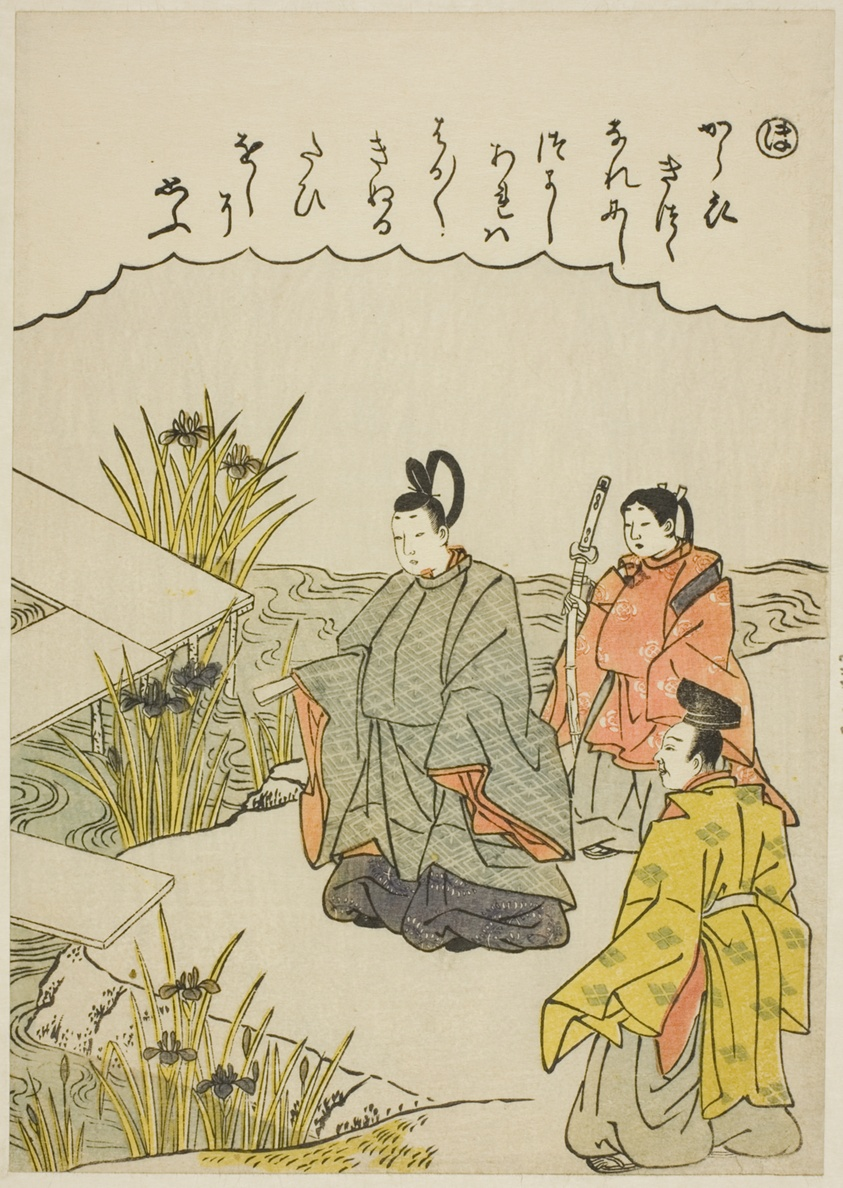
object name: Print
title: "Ho": Yatsuhashi Bridge in Mikawa Province, from the series "Tales of Ise in Fashionable Brocade Pictures (Furyu nishiki-e Ise monogatari)"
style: Japanese (culture or style)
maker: Katsukawa Shunsho 勝川 春章; Japanese, 1726-1792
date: c. 1772/73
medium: Color woodblock print; koban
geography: Japan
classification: woodblock print; print; asian art